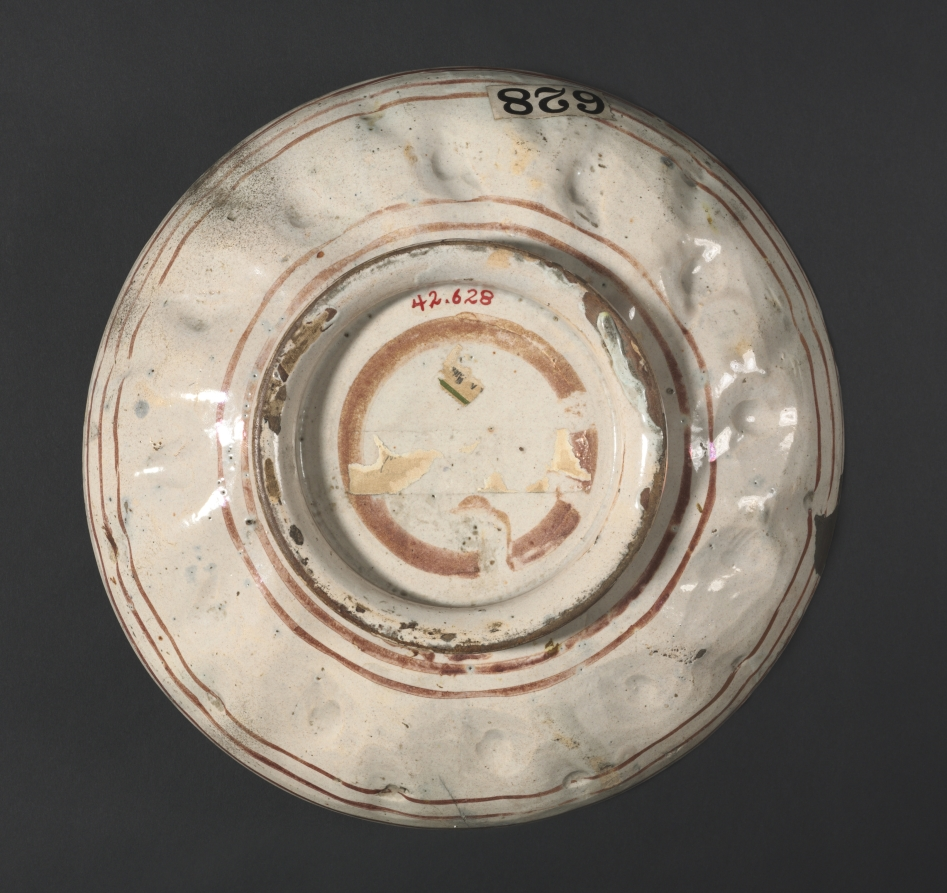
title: Bowl: Bust of Paul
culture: Italy, 16th century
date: c. 1535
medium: tin-glazed earthenware with gold and red lustre (maiolica)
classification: Ceramic